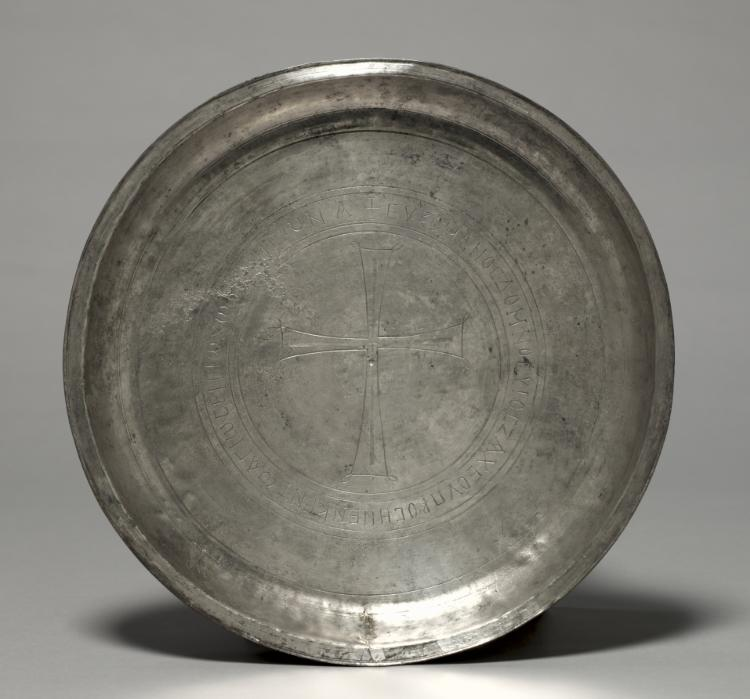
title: Paten (Dedicated to Saint Sergius) from the Beth Misona Treasure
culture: early Byzantium, Constantinople or Syria, Byzantine period, 6th-7th Century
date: c. 500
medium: silver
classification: Metalwork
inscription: the Greek inscription surrounding the cross in the center translates as: + Having vowed, DOMNOS, son of ZACHEOS, has offered (this paten) to St. Sergois of the village of Beth Misona.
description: These four liturgical silver vessels—a paten and three chalices (1950.378–81)—form what is now called the Beth Misona Treasure, named for the village in northern Syria for which the objects were made. While nothing is known about the exact location and circumstances of the treasure's discovery, the people of the village of Beth Misona were, like other Christian communities in Syria and Palestine, probably forced to bury their church silver to hide it from the Persians or Arabs, who conquered their lands in the first half of the 600s. The paten, which held pieces of Eucharistic bread used during Mass, is decorated with an engraved Latin cross surrounded by a dedicatory inscription that names the paten's donor—Domnos—and its original location, the church of Saint Sergios in Beth Misona. The chalices, which contained the Eucharistic wine used during Mass, feature broad cups decorated with portrait busts of Saints Peter and Paul, Christ, and the Virgin. One chalice bears a dedicatory inscription naming its donor—Kyriakos, Domnos's son—and the priest of the church that received the pious gift—Zeno.